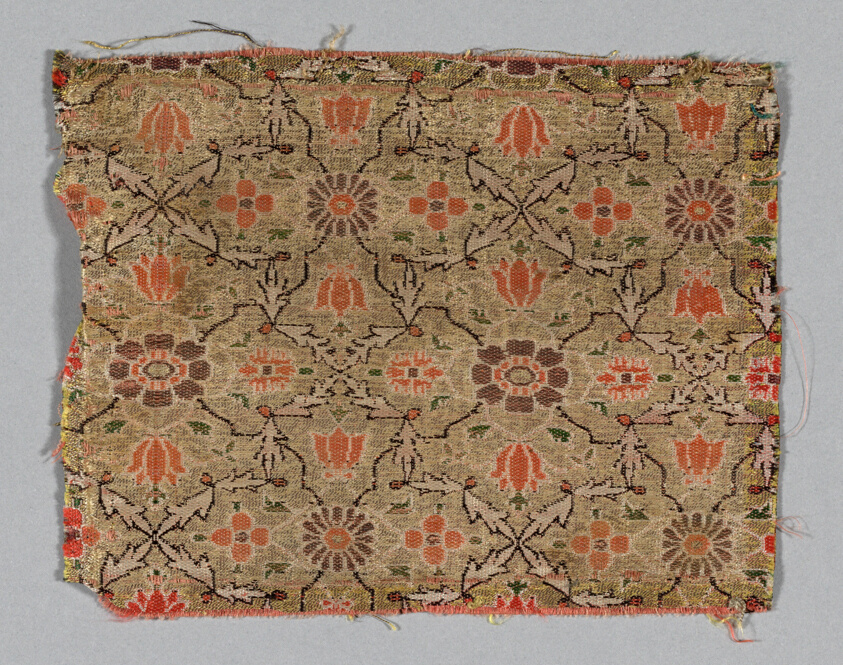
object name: Textile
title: Fragment (Dress Fabric)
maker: Near East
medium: Silk and gilt strip wound around a silk fiber core, plain weave of multiple ground wefts and inner or filler warps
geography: Iran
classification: textile; weaving